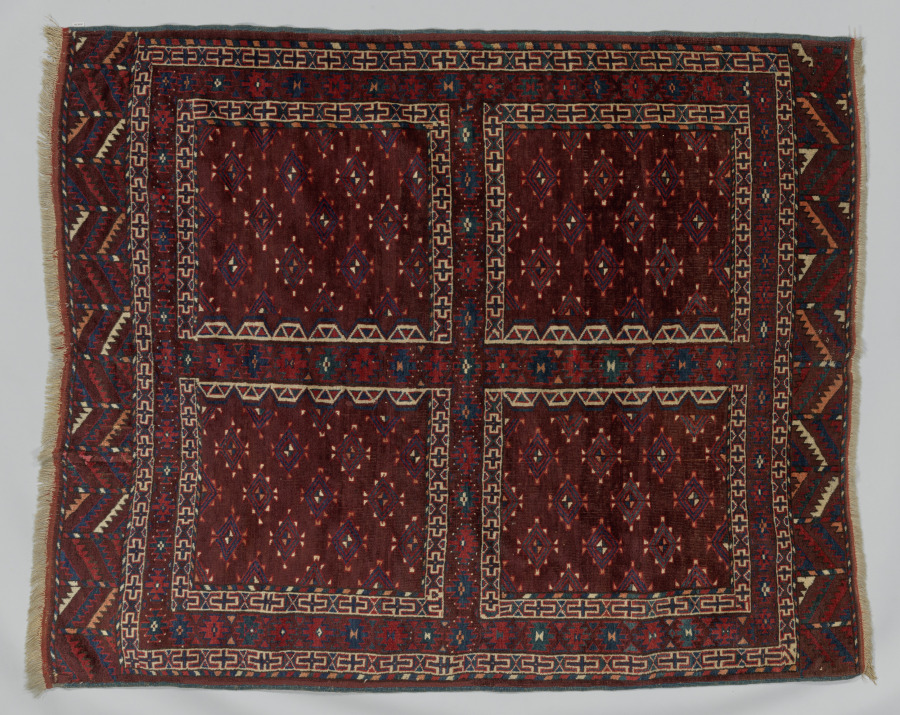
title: Door Rug (Ensi)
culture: Turkmenistan, Yomud, 19th century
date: c. 1900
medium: knotted pile, asymmetrical knot, 117 knots psi; wool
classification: Carpet